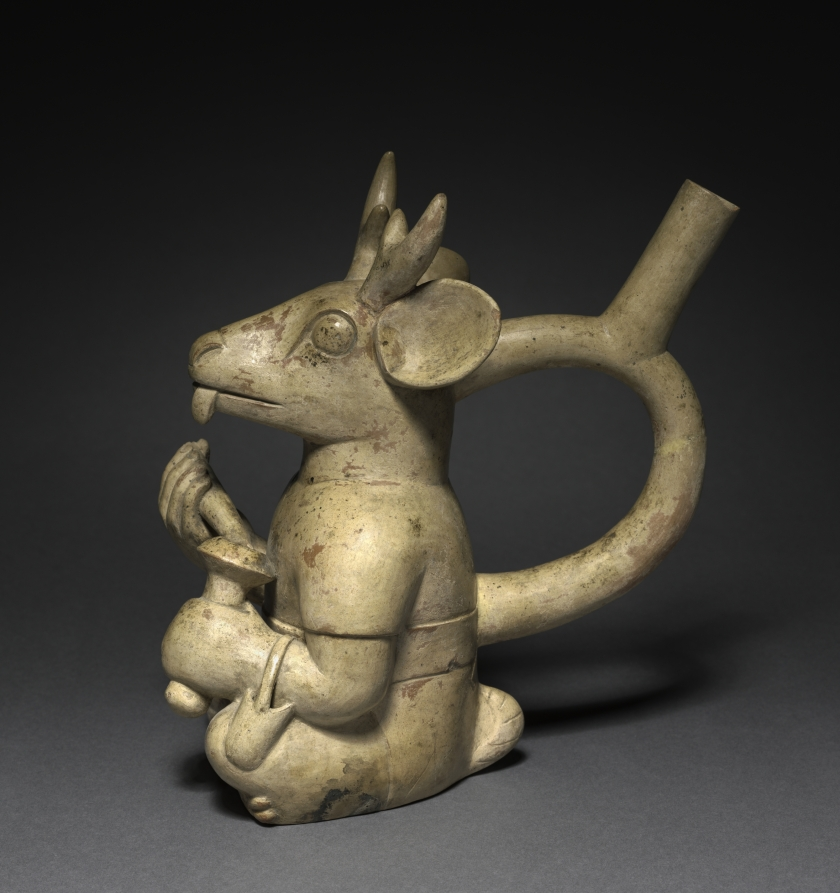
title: Deer-Headed Figure Vessel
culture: Central Andes, North Coast, Moche people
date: 200–850 CE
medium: ceramic, slip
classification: Vessels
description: Moche imagery includes an intriguing world of creatures that mingle traits from different realms: beans sprout human legs and race up a spout, jars leap with human feet to pour themselves, and animals wield weapons in two hands. This figure, with a stag’s head but a human’s body, is an example. He is engaged in a coca-leaf chewing ritual and thus holds a bag for the leaves along with a container of powdered lime that is one of the ritual’s key ingredients.